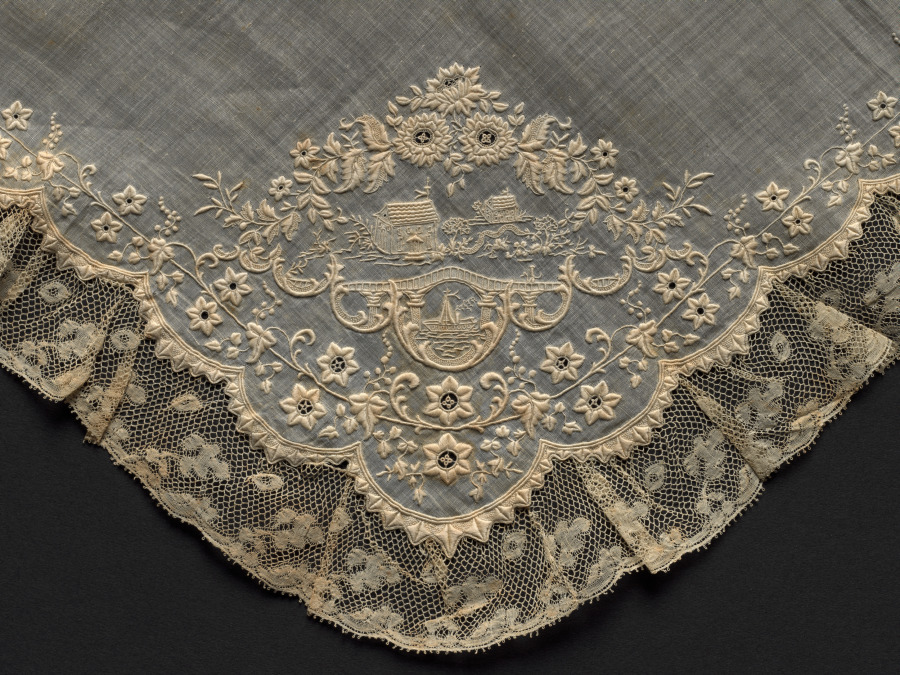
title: Lace Handkerchief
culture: France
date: 1700s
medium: Plain weave linen ground: bobbin lace (Valenciennes lace) edging and embroidery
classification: Embroidery